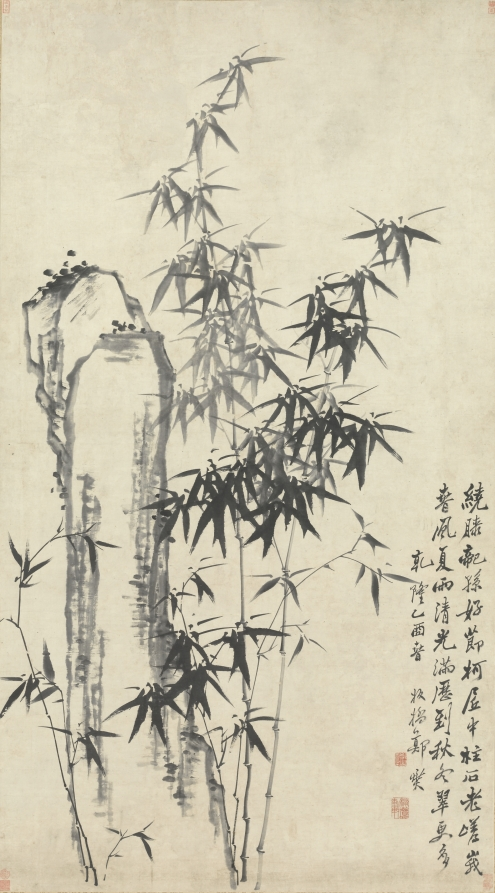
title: Bamboo and Rock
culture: China, Qing dynasty (1644–1911)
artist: Zheng Xie (Chinese, 1693–1765)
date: 1765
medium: hanging scroll; ink on paper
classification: Painting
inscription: Artist's inscription and two seals at lower right.